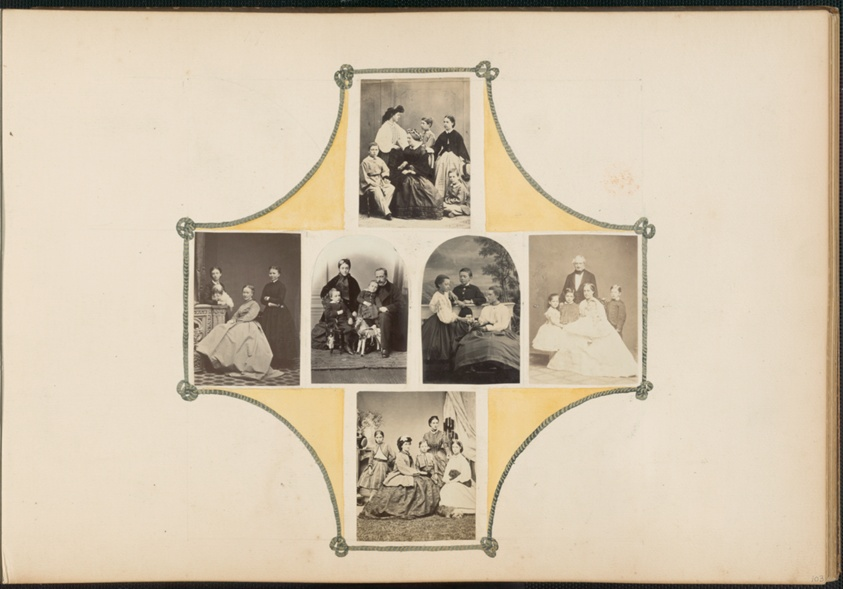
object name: Photograph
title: The Madame B Album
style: 19th century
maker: Marie-Blanche Hennelle Fournier (French, 1831–1906)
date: 1870s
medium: Albumen prints with watercolor (in album)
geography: France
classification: photograph; albumen silver print; photography